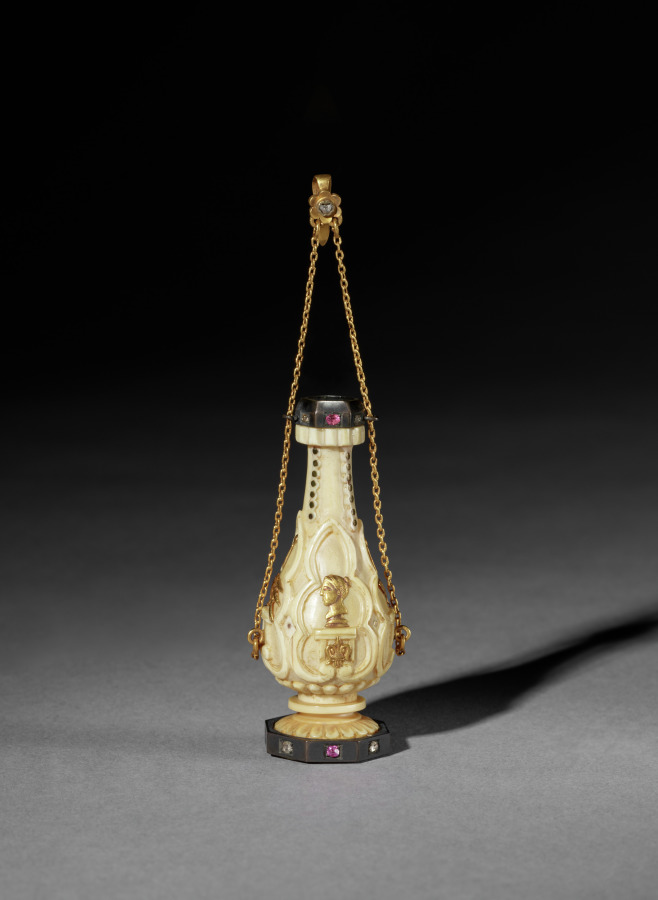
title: Scent Bottle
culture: Continental, mid-19th century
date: mid-1800s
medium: ivory with gold and silver mounts set with jewels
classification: Miscellaneous